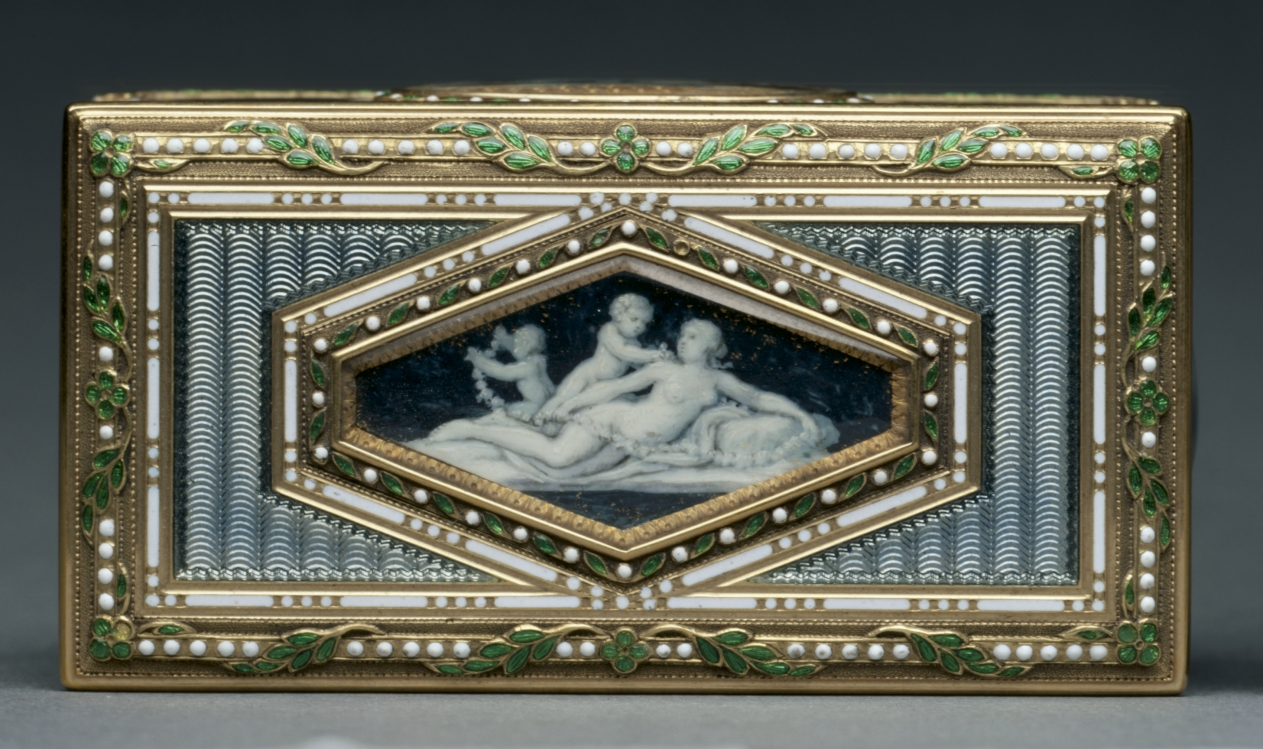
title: Snuff Box (Tabatière)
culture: France, 18th century (style of Louis XVI)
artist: François Chazeray (French)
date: 1777–78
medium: gold and enamel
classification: Metalwork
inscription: [Maker's mark of François Chazeray, master goldsmith in 1760, cover; bottom; front wall]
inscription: [Warden's mark (probably a crowned "O"), Paris, 1777-1778, cover; bottom; front wall]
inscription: [Illegible mark, bottom]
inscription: [Illegible mark, cover]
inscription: [Illegible charge mark, inside front]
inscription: [Discharge mark of Jean-Baptiste Fouache, Paris, 1774-1780, on neck at left.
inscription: [Outside of neck, modern inscription '4 (modern inscription]:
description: This box is decorated with figures of antiquity associated with love: winged cupids, dancing nymphs, and representations of the Greek goddess of love. These scenes are inspired by antique cameos, intricately carved gemstones crafted in ancient Greece and Rome. This interest in ancient iconography, symmetry, and classical compositions of gods and goddesses was characteristic of 18th-century neoclassicism.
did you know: Decorated with allegorical scenes of love, it is likely that this box was a present between lovers.